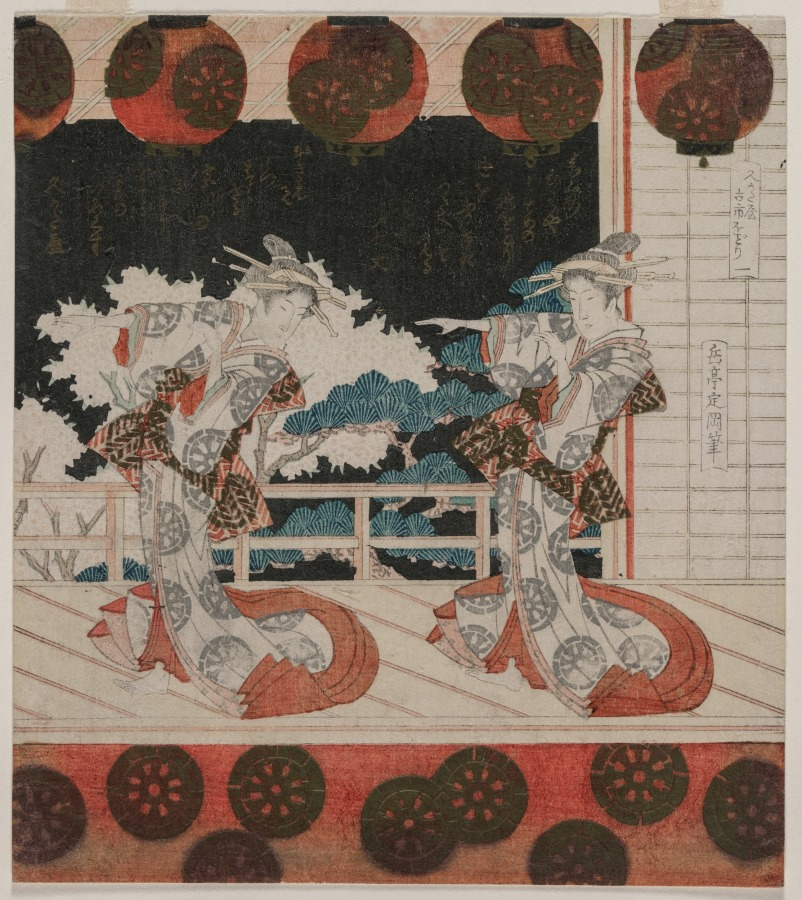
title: Furuichi Dance at the Hisagataya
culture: Japan, Edo period (1615–1868)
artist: Gakutei Harunobu (Japanese, 1786(?)–1868)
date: mid 1820s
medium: first of a pentaptych of woodblock prints; ink and color on paper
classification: Print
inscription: Signature: Gakutei Sadaoka hitsu